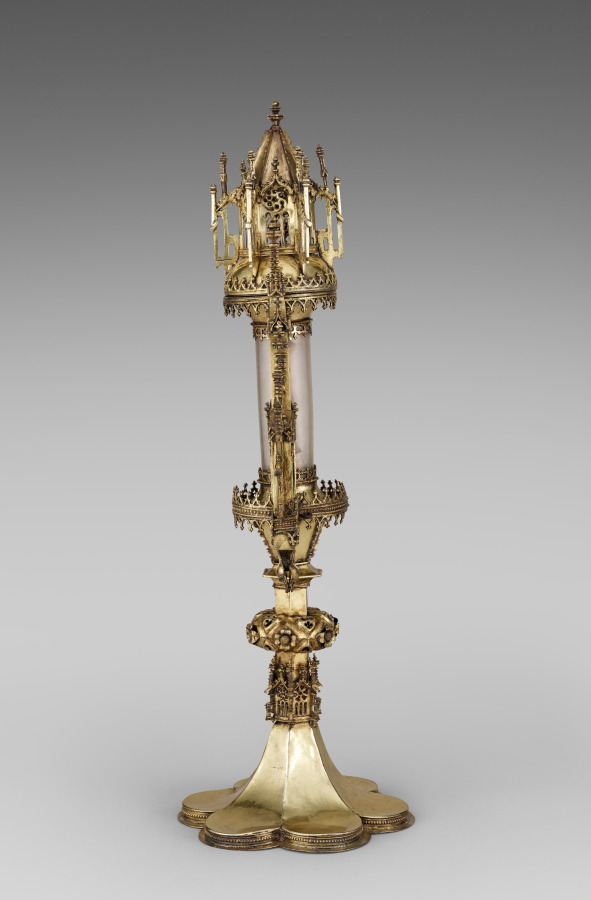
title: Monstrance with a Relic of Saint Sebastian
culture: Germany, Lower Saxony, Brunswick, Gothic period, 15th century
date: 1484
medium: gilded silver, rock crystal, bone, parchment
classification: Metalwork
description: This Late Gothic monstrance (from the Latin monstrare, "to show") is mentioned in the earliest inventory of Saint Blaise as "a large new monstrance containing relics of Saint Sebastian the martyr." Judging from surviving receipts, the reliquary was made by Werner Korff, a local goldsmith, who received payments for silver and gilding at the end of 1484. The reliquary was first displayed on the altar of the church of Saint Blaise in a solemn penitential mass on June 4, 1484, in an effort to ward off the plague. A recent examination revealed that the relic is a human metatarsal bone (one of five long bones of the human foot) and that its owner seemed to have suffered from periostitis, a medical condition that affects the connective tissue surrounding the bone.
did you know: In the Middle Ages, people suffering from diseases might make a journey, or pilgrimage, to venerate relics such as this one. The faithful believed that the remains of saints and holy people like Saint Sebastian could help those seeking aid such as relief from the plague.